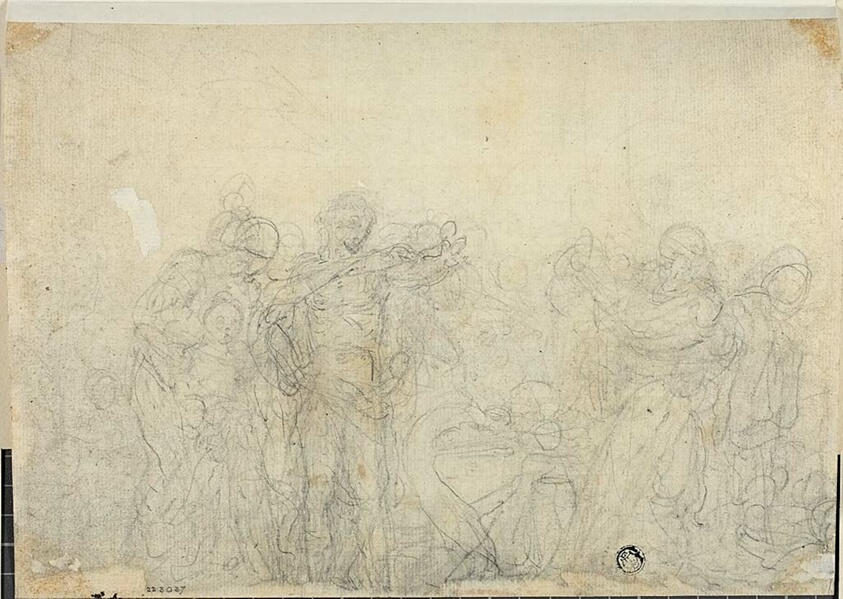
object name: Drawing and Watercolor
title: Aeneas at the Tomb of Anchises (recto); Aeneas at the Tome of Anchises (verso)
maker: Attributed to Nicolas Bernard Lépicié; French, 1735-1784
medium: Pen and gray-brown ink, with brush and gray wash, over traces of graphite (recto), and black chalk (verso), on ivory laid paper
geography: France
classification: ink or chalk wash; drawings (visual works); prints and drawing